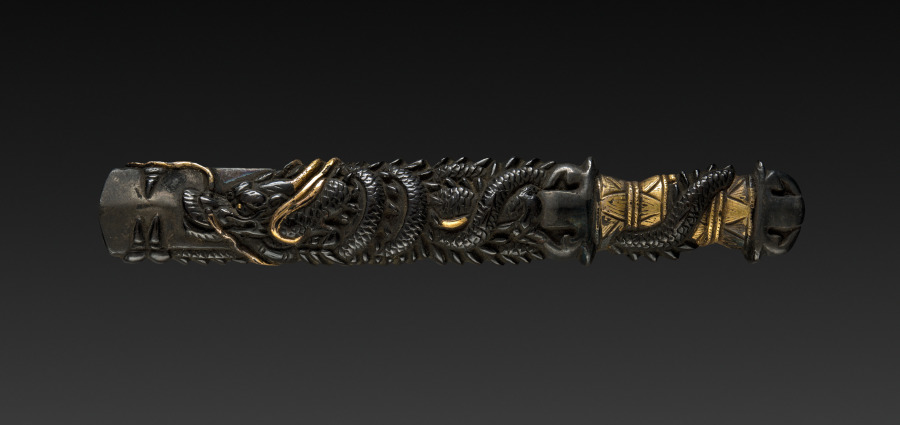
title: Knife Handle (Kozuka)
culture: Japan, Edo period (1615–1868)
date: early to mid-1800s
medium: iron and gold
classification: Metalwork